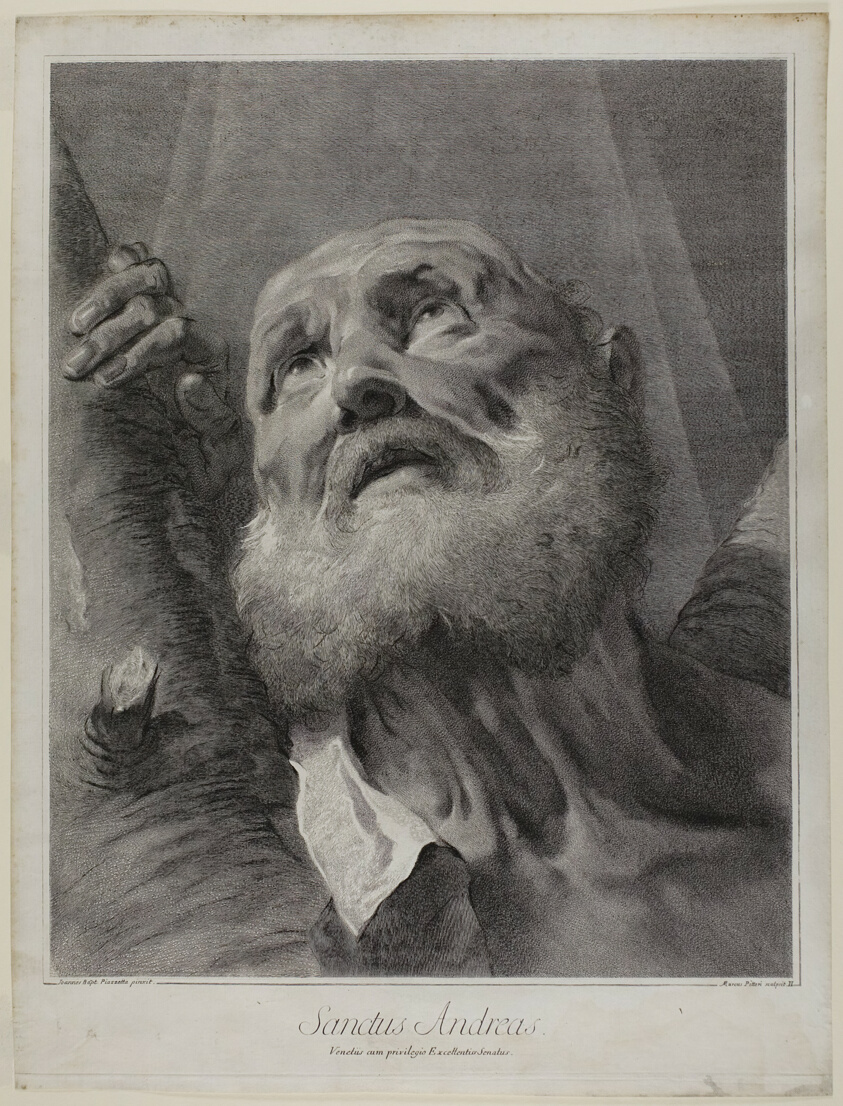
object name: Print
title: Saint Andrew, from The Holy Family and the Twelve Apostles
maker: Giovanni Marco Pitteri (Italian, 1702-1786); after Giovanni Battista Piazzetta (Italian, 1682-1754)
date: 1742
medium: Engraving in black on paper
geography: Italy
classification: engraving; print; prints and drawing